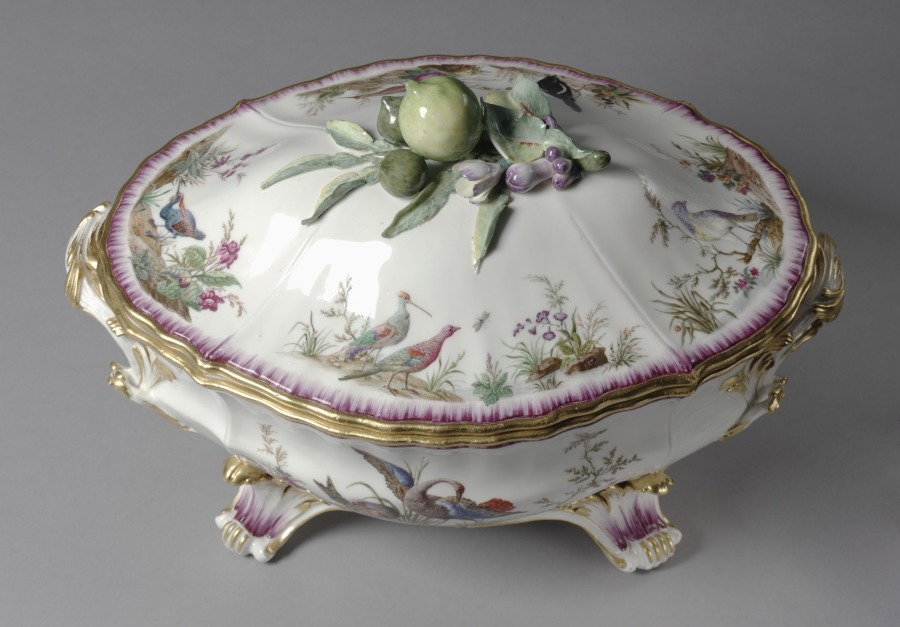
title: Covered Tureen (Terrine ancienne or Terrine ordinaire)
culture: France, Vincennes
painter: attributed to Louis-Denis Armand (French, active c. 1745–1783)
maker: Vincennes Porcelain Factory (France, 1740–56)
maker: probably by Jean-Claude Duplessis le Père (French, 1690–1774)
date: c. 1752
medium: soft-paste porcelain with enamel and gilt decoration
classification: Ceramic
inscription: [Interlaced foliate 'L's surmounted by a fleur-de-lys (indicating royal commision), in blue]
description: The intricately painted birds that decorate this tureen are the work of Louis-Denis Armand. Armand was known for his depictions of birds and landscapes, a specialty that may have come from his work as a painter of lacquered furniture with similar compositions. This tureen was likely designed by master goldsmith Jean-Claude Duplessis who began working as an artistic director at the Vincennes Porcelain Factory in 1748.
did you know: This object was manufactured in soft-paste porcelain, a material used by many European porcelain factories before they were able to emulate the hard-paste porcelain of China and Japan.